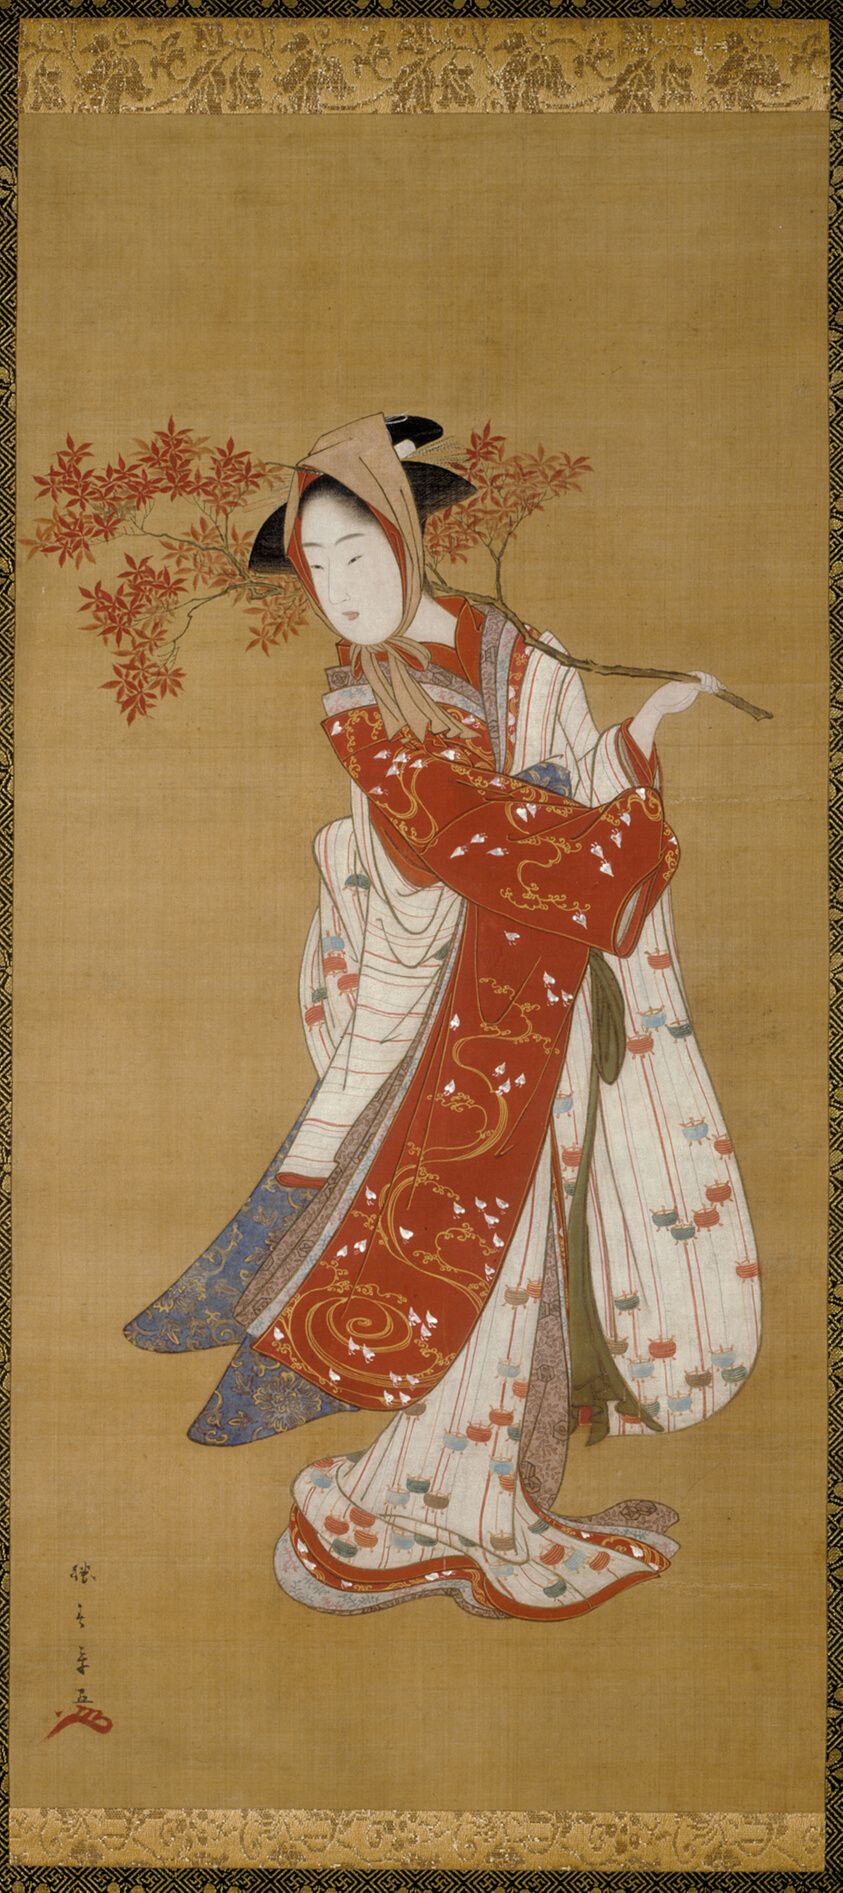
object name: Painting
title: Dancer with a Maple Branch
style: Japanese (culture or style)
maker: Katsukawa Shunsho 勝川 春章; Japanese, 1726-1792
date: About 1780-90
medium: Hanging scroll; Ink, color, and gold on paper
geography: Japan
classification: hanging scroll; painting; asian art